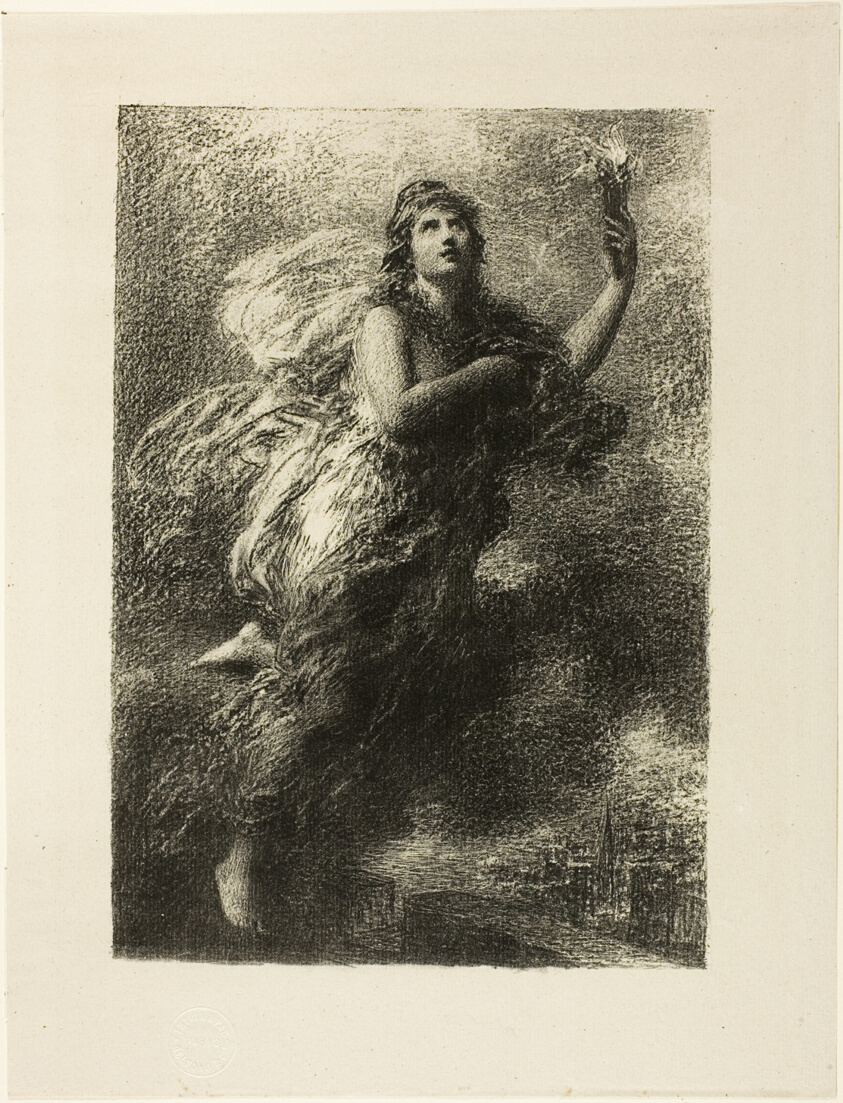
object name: Print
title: Liberty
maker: Henri Fantin-Latour (French, 1836-1904)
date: 1890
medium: Lithograph in black on gray laid paper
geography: France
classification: lithograph; print; prints and drawing